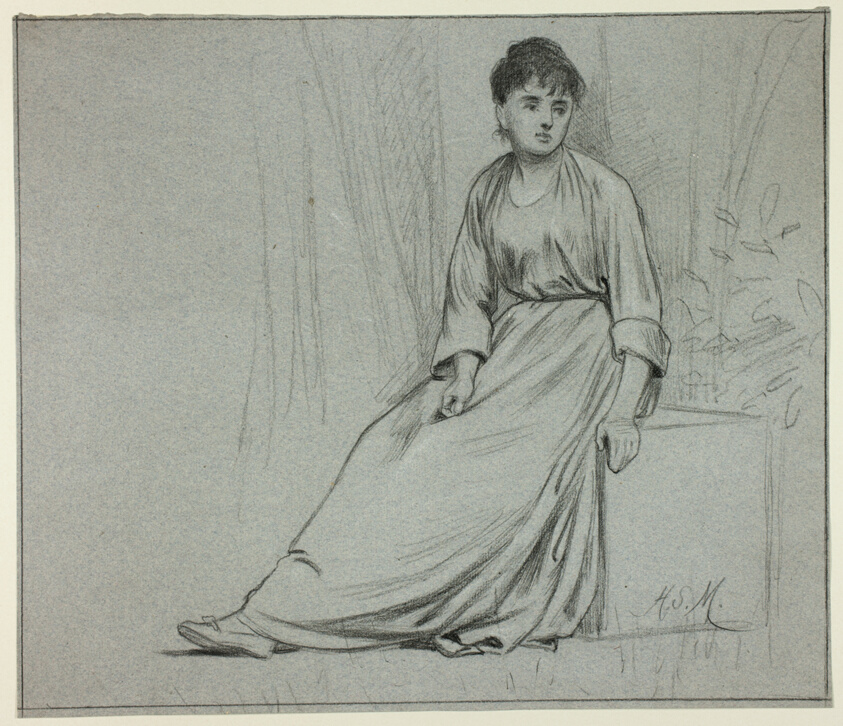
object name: Drawing and Watercolor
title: Seated Woman Facing Right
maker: Henry Stacy Marks (English, 1829-1898)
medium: Black pastel, with touches of white pastel, on blue laid paper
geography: England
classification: pastel; drawings (visual works); prints and drawing